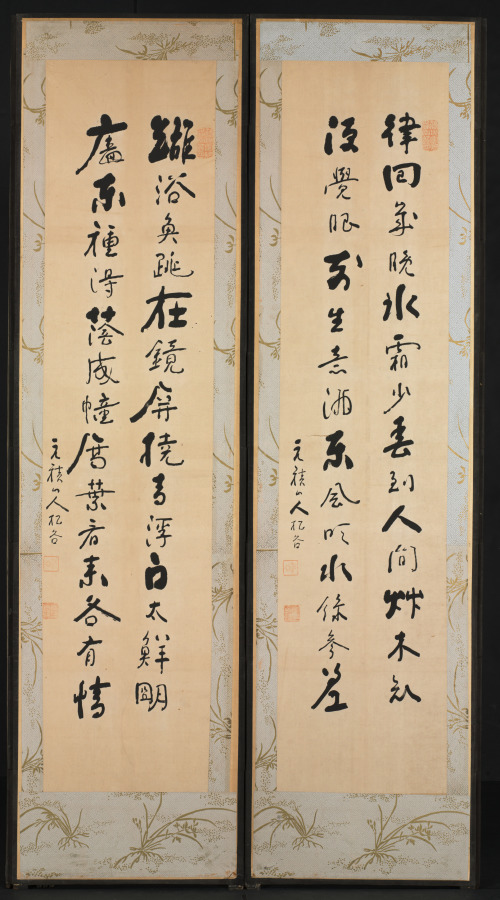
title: Calligraphy (reverse)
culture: Korea, Joseon dynasty (1392–1910)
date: late 1800s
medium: Ten-panel folding screen affixed with album leaves (obverse), calligraphy (reverse), ink and color on silk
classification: Painting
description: The front of this screen features an assortment of subjects: birds and flowers, landscapes, and scenes of everyday life, mostly in monochromatic ink with light colors. The screen’s reverse side conveys a number of classical poems about the fleeting beauty of the four seasons. Traditionally, only one side of a folding screen bears painted or embroidered images, since these were used as a background furnishing. In Korean houses by the 1800s and early 1900s, however, two-sided folding screens became noticeably popular, possibly inspired by Japanese double-sided folding screens, which mainly served as room dividers in Japanese households.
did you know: A calligrapher has brushed several Chinese poems about the four seasons on the reverse side, among them "Composing in the Daytime of Summer" by Tang poet Liu Zongyuan (773–819) and "Composing when Spring Begins" by Song scholar Zhang Shi (1133–1180).